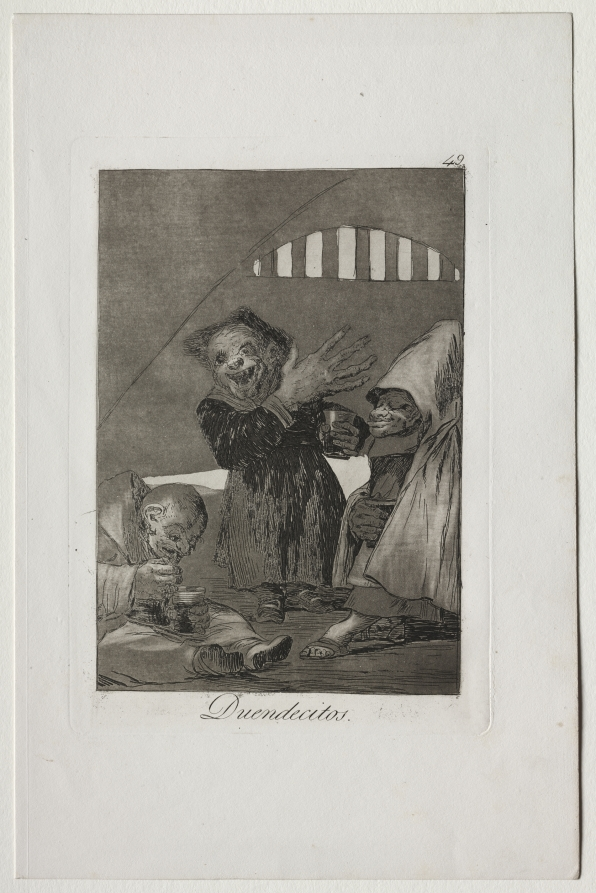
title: Hobgoblins, Plate 49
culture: Spain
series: Los Caprichos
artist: Francisco de Goya (Spanish, 1746–1828)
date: 1799 (printed c. 1855)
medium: etching and aquatint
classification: Print